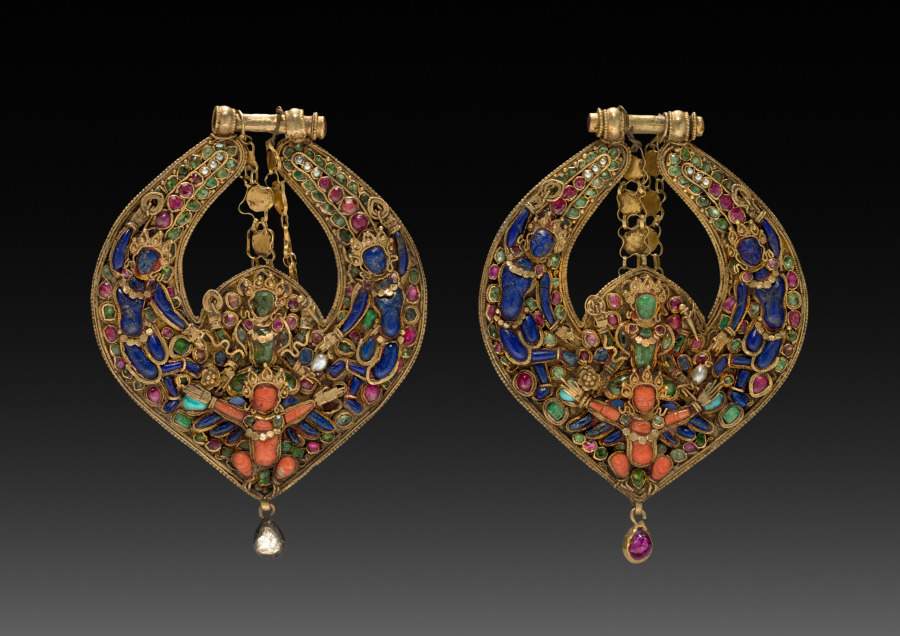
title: Pair of Deity Earrings with Vishnu on Garuda (front) and chepu (monster mask) (back)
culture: Nepal, Kathmandu Valley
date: 1600s or 1700s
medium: Gold set with precious and semi-precious stones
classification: Jewelry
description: A green Vishnu with four arms, each holding his attributes of discus (his upper right hand), mace (upper left), lotus (lower right), and conch (in pearl, lower left) rides on a coral Garuda with lapis wings, arms outstretched. The blue figures on either side are probably celestial beings praising him in dance postures, with one leg crossed over the other. On the back sides, delicate filigree floral scrolls form the backdrop of a protective mask popular in the Nepal; a sun over a crescent moon are inlaid above his head.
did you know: These larger-than-life earrings would hang on a deity statue in a Nepalese temple, rather than worn by a person.